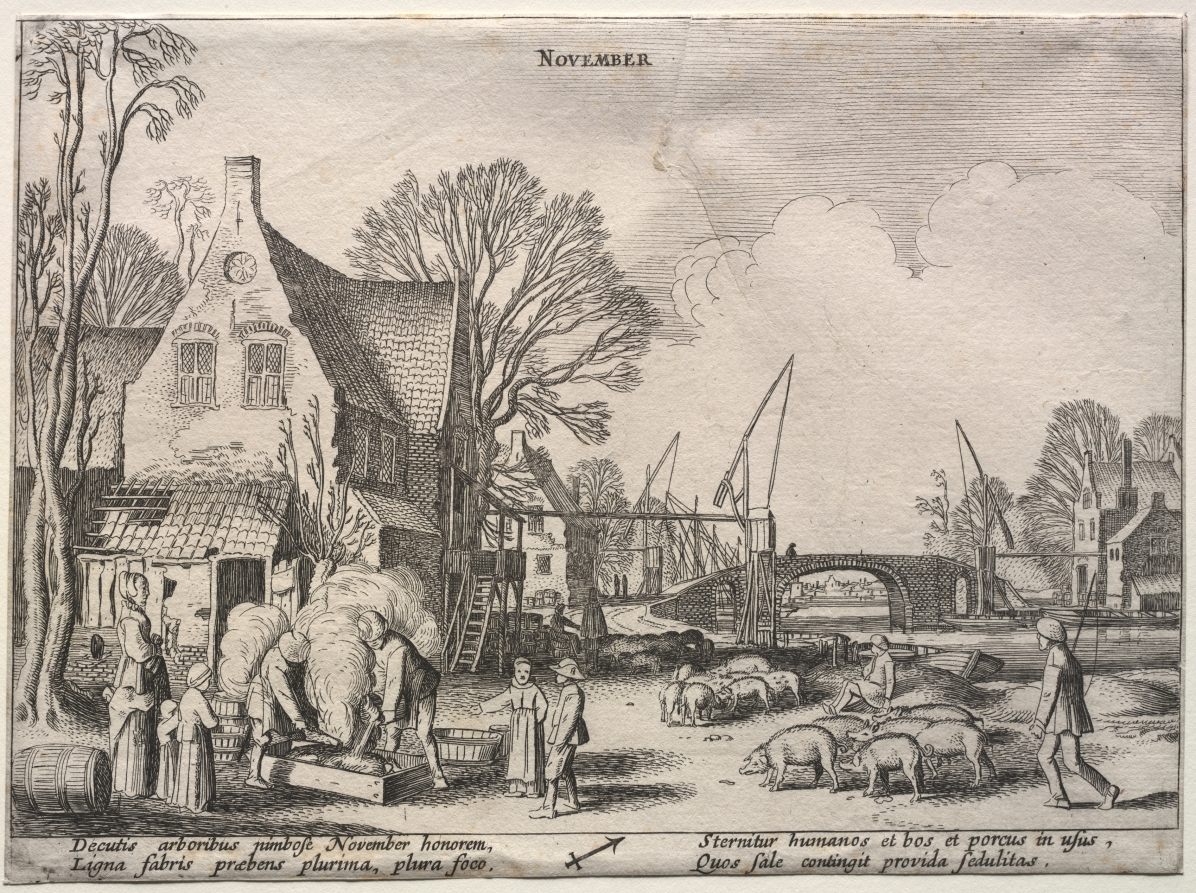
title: The Twelve Months: November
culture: Netherlands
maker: Jan van de Velde II (Dutch, 1593–1641)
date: 1608–18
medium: etching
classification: Print